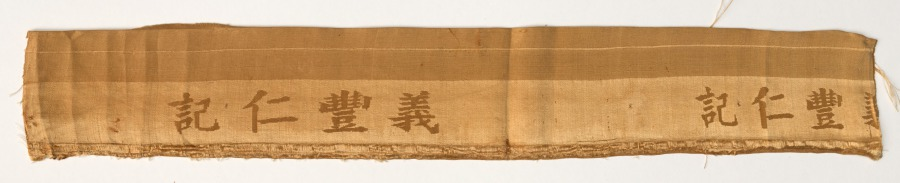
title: Fragment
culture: China, Qing dynasty (1644-1911)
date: 1800s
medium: silk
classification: Textile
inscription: 記仁豐義